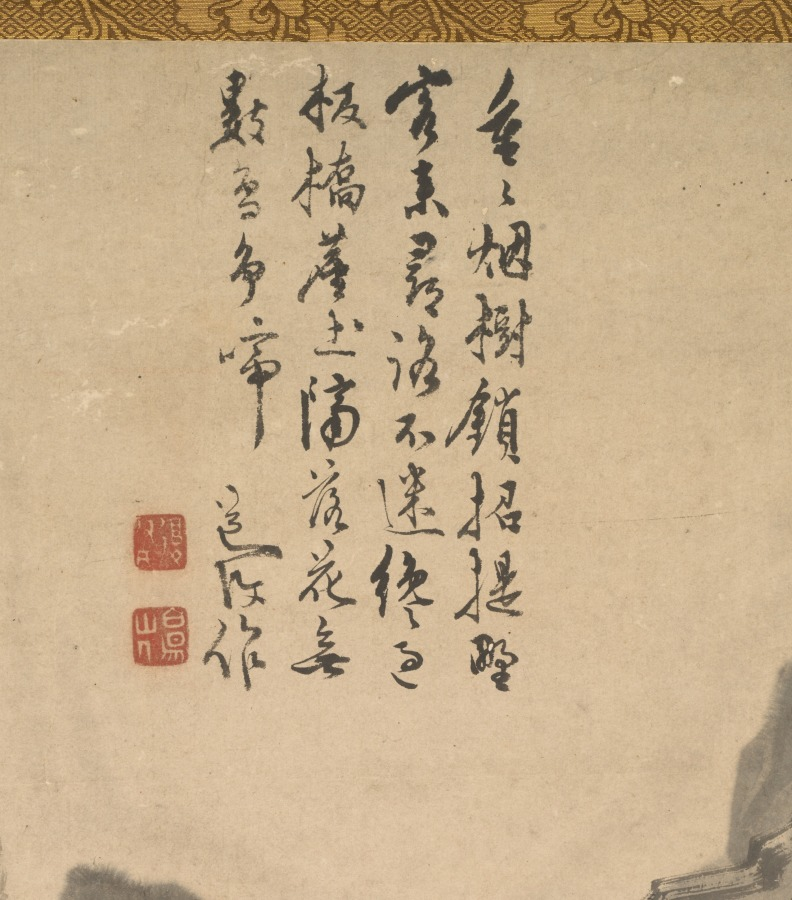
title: Looking for a Monastery in the Misty Mountains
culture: China, Ming dynasty (1368–1644)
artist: Chen Chun (Chinese, 1483–1544)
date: 1500–1544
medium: hanging scroll, ink on paper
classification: Painting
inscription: Artist's inscription, signature, and 2 seals: Row after row of misty trees envelop the Buddhist Monastery./ But the rustic who comes to find it will not lose his way./ Just across the wooden bridge, the dusty world is cut off;/ Among the countless falling petals, birds are singing confusedly. Daofu 道複 composed [this]. [seals] Fufu shi 復甫; Baiyang shanren 白陽山人. trans. WKH/LYSL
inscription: 3 additional unidentified seals.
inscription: 1 additional unidentified seal on the back of the mounting.